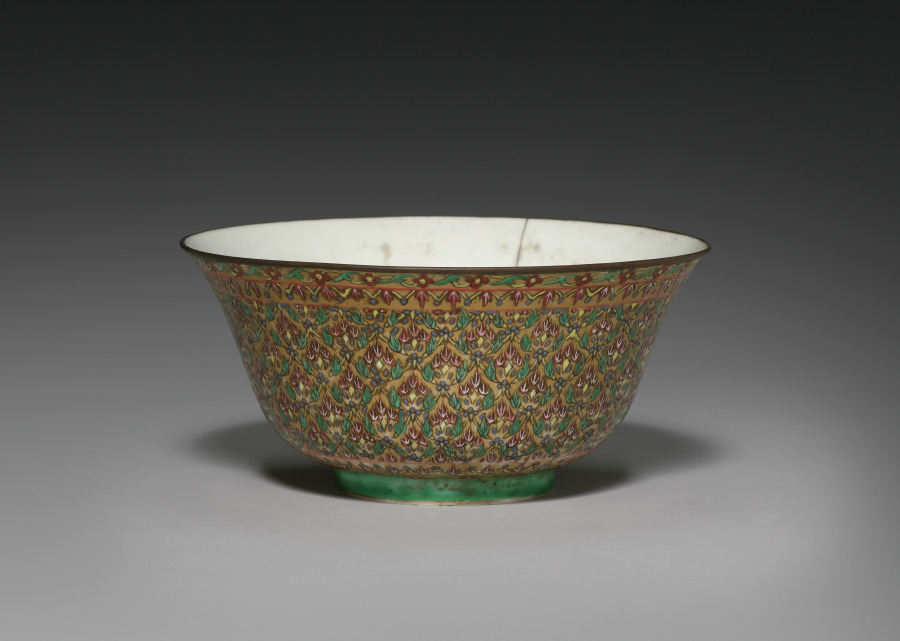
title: Chow Bowl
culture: Siam, 18th century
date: 1700s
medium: porcelain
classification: Metalwork